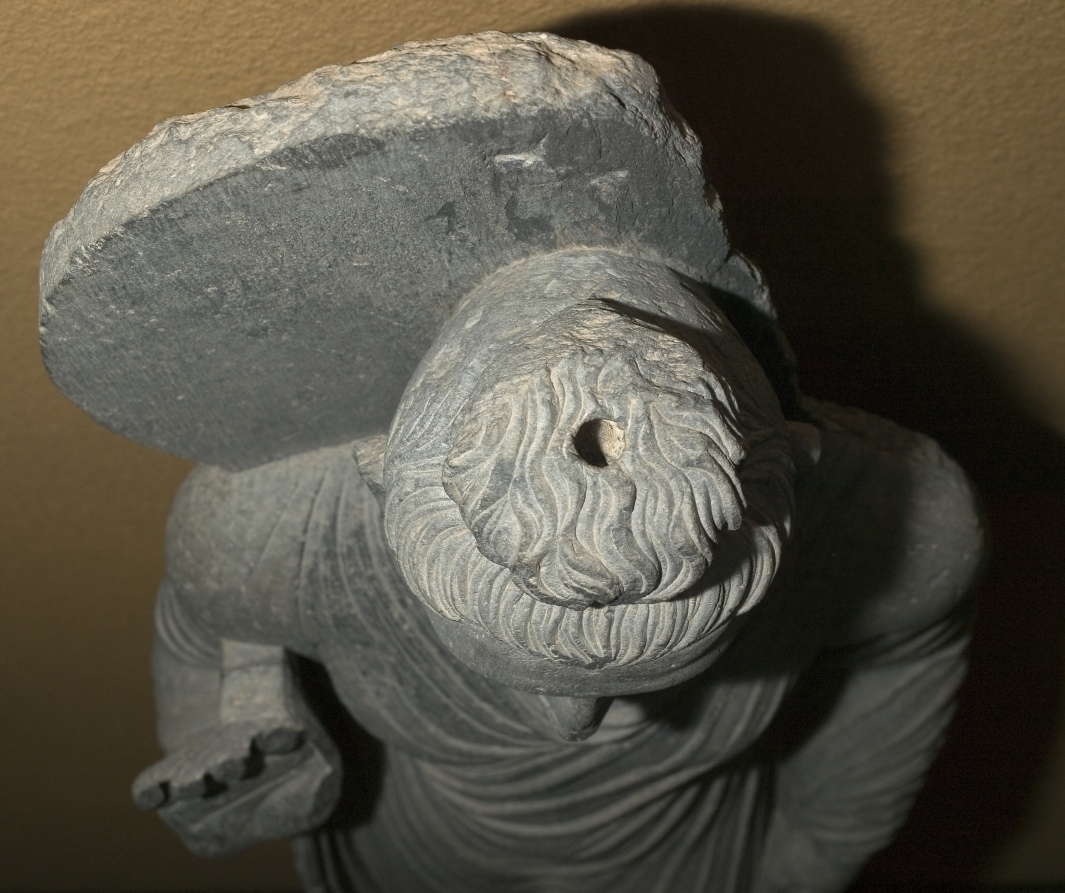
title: Standing Buddha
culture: Pakistan, Gandhara, Kushan period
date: 150–200 CE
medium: schist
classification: Sculpture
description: Combining elements from both the Mediterranean and South Asian worlds, the artists of Gandhara created a new vision of the Buddha during the period of high contact between the two regions from the 100s to 200s AD. They were among the first to show the Buddha with a placid expression, thick wavy hair, and clothed in a heavy, toga-like monk’s robe.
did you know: The cavity at the top of the head may have once held a portion of the Buddha's relics.